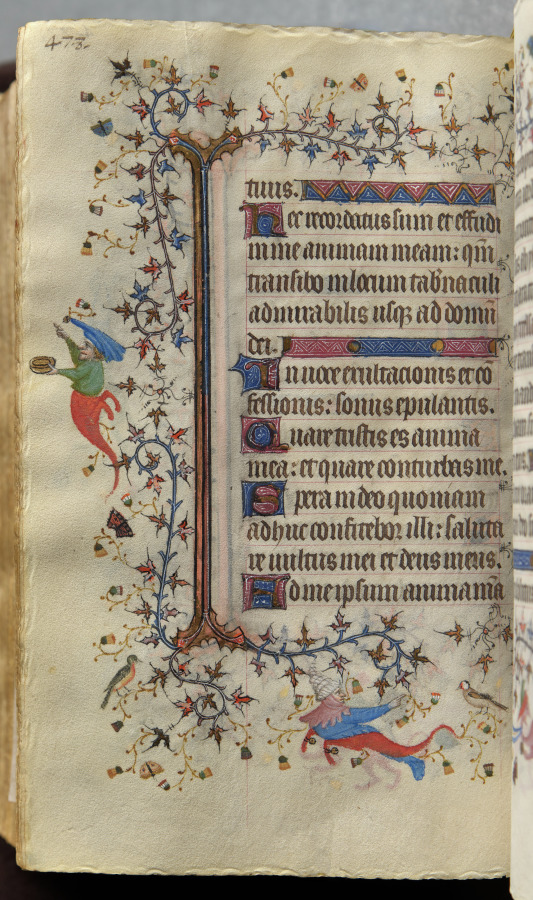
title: Hours of Charles the Noble, King of Navarre (1361-1425): fol. 233v, Text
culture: France, Paris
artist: Master of the Brussels Initials and Associates (French)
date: c. 1405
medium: ink, tempera, and gold on vellum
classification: Bound Volume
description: This precious volume was obviously highly prized by its owner, the French-born King of Navarre, who had his coat of arms painted on no less than twenty folios. Rather than directly commissioning this manuscript from a specific workshop, it seems that Charles the Noble acquired his book of hours -- perhaps ready-made for the luxury market -- while on a trip to Paris in 1404-05. A collaborative effort, six painting styles are evidenced within the pages of this codex, those of two Italians, two Frenchmen, and two Netherlanders. The painter who was responsible for the planning and decoration of the book, and who produced seventeen of the large miniatures, was a Bolognese artist known as the Master of the Brussels Initials. His principal assistant, responsible for most of the borders, was a Florentine who signed his name "Zecho" da Firenze on folio 208 verso.